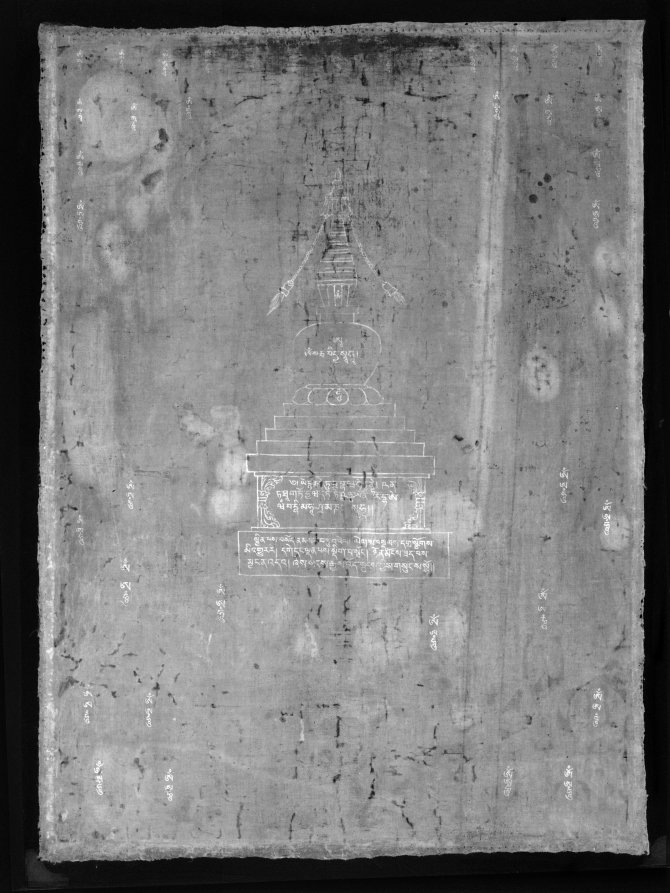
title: Eleven-Headed, Thousand-Armed Bodhisattva of Compassion (Avalokiteshvara)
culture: Western Tibet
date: c. 1500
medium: Gum tempera and ink on cotton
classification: Painting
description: One thousand arms surround the central figure like a radiating halo. Each hand has an eye in the palm to see the suffering of all beings, generating the sense of compassion that this figure embodies. The special form of the central image of the bodhisattva Avalokiteshvara derives from the mystic vision of a nun named Gelongma Palmo, who was born a Kashmiri princess, but prayed for leprosy to avoid having to marry and became an accomplished nun. While meditating in a cave, she achieved this vision of 11-headed, 1,000-armed Avalokiteshvara, who cured her leprosy and guided her on the path to enlightenment.